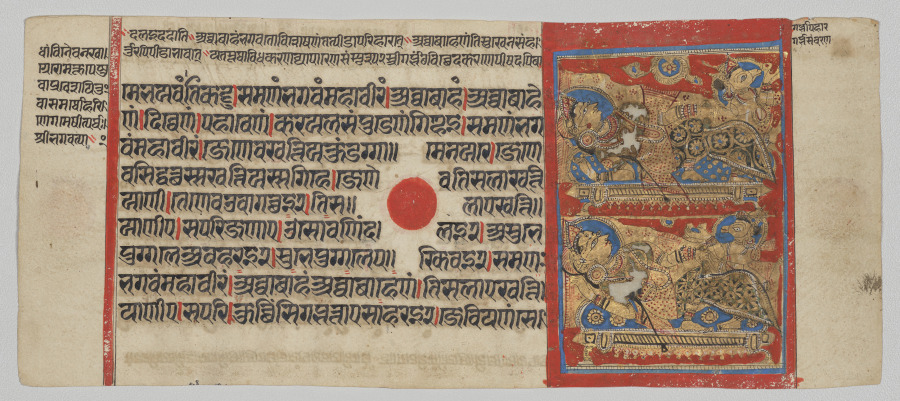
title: Transfer of the Embryo of Mahavira, Folio 12 (recto), from a Kalpa-sutra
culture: Western India, Gujarat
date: c. 1475–1500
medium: Gum tempera, ink, and gold on paper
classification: Painting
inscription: [[upper right]] garbhāpahāra/garbhasaṃvaraṇa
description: The tiny captions written in Sanskrit to the right of the painting identify the subject of this scene: “abduction of the embryo” and “transfer of the embryo.” The embryo is the unborn founder of the Jain religion. In this miraculous episode, a goat-headed divinity who presides over miscarriage and childbirth gently takes the embryo in his cupped hands away from the reclining Brahmin lady in the scene above. Below, he carries it to a queen, who will be the birth mother.